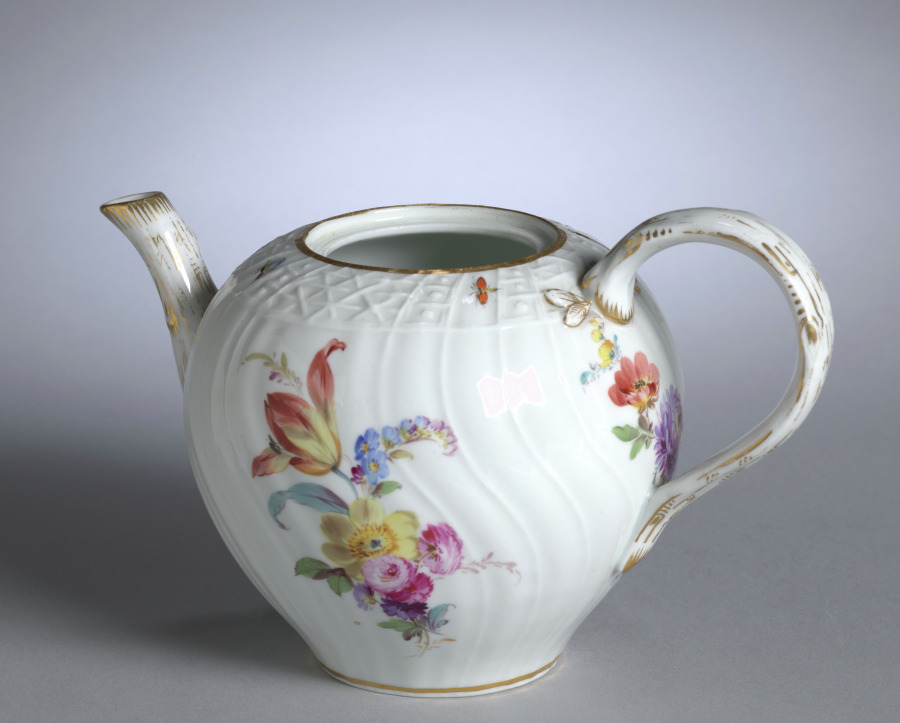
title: Teapot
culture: Germany, Meissen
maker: Meissen Porcelain Factory (German, est. c. 1710)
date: c. 1750–70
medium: porcelain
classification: Ceramic